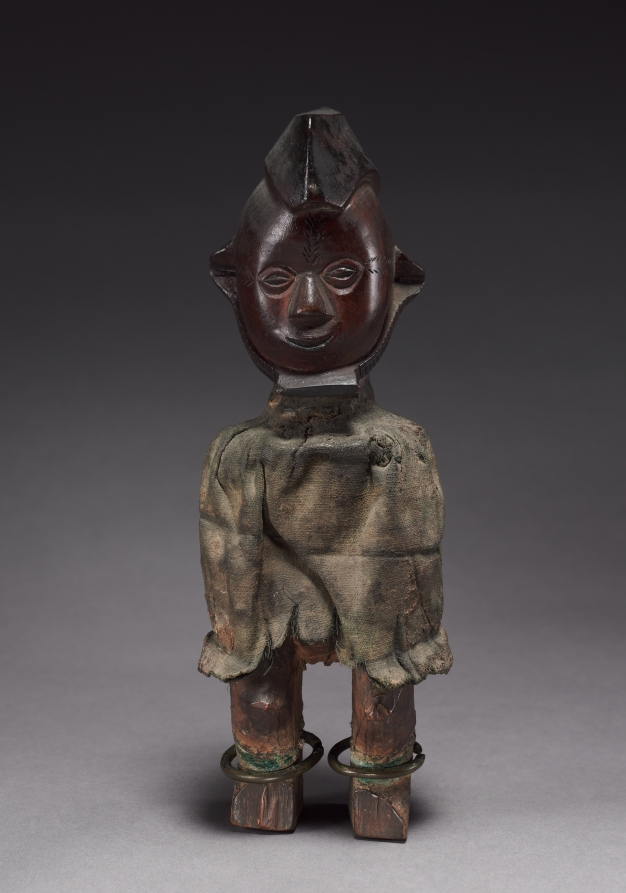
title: Male Figure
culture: Africa, Central Africa, Republic of the Congo or Democratic Republic of the Congo, Teke-style maker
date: late 1800s-early 1900s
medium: Wood, cloth, organic material, and copper alloy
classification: Sculpture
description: This figure was the Delennes' first African art acquisition. They purchased the work in Paris in 1958—the year they were married—from the then leading French dealer Henri Kamer. The couple's interest in African art, which also inspired this particular acquisition, was triggered by their visit to the Congolese pavilion at the Brussels world's fair that same year. This experience made a lasting impression and triggered a lifelong appreciation for the art of what was then still the Belgian Congo. Although Odette later admitted that she knew that this figure was not the best example of Teke art, she and her husband held on to it because it served as a personal souvenir of their meeting each other.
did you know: This figure was the Delennes' first African art acquisition; it symbolized Rene and Odette’s first meeting.